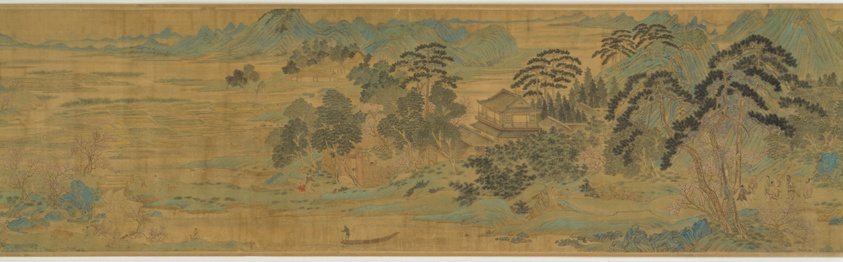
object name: Painting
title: The Peach Blossom Spring 桃花源圖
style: Chinese (culture or style)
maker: Artist unknown (17th century), spurious signature of Qiu Ying 仇英 (c. 1500-1552); Chinese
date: Late Ming (1368–1644) or early Qing (1644–1912) dynasty 明朝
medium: Handscroll; ink and color on silk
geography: China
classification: handscroll; painting; asian art